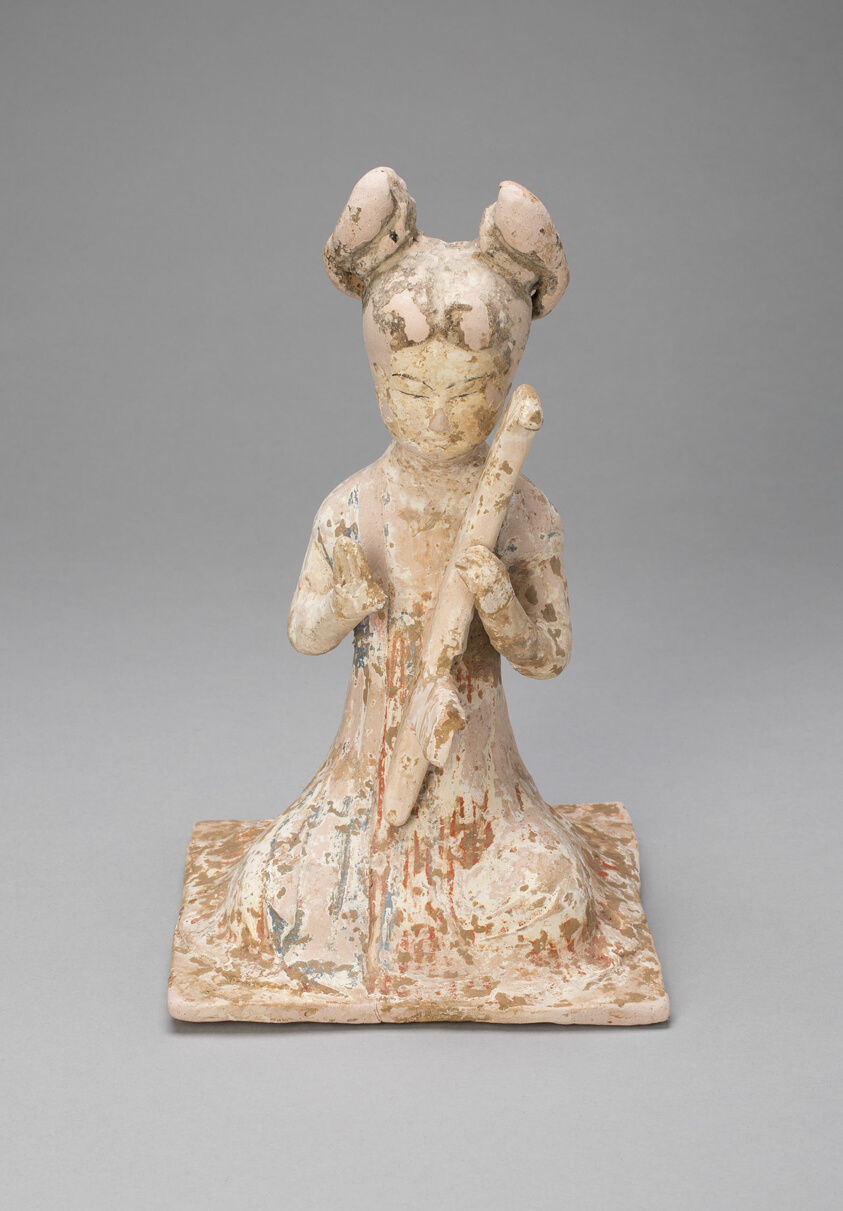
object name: Sculpture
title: Female Musician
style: Chinese (culture or style)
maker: China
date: Tang dynasty (618–907), late 7th or early 8th century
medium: Earthenware with polychrome pigments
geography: China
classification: statuette; sculpture